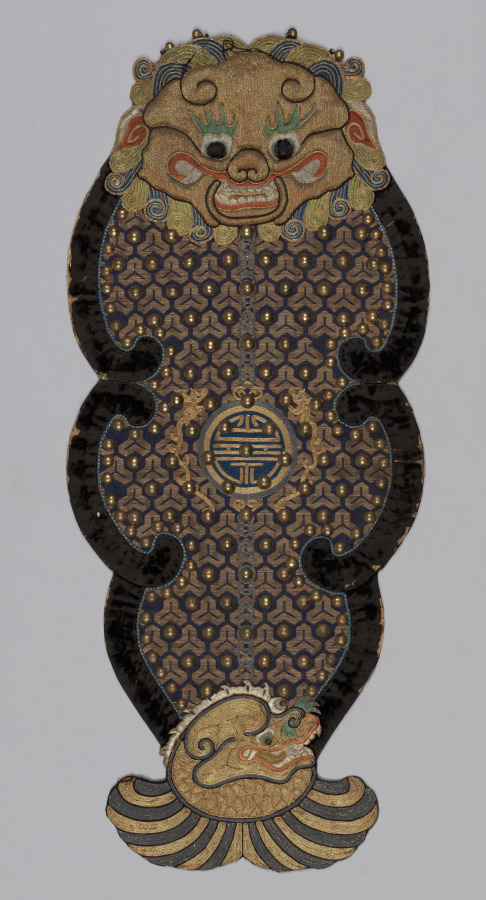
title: Ceremonial Uniform: Groin Apron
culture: China, Qing dynasty (1644-1911)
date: 1644–1911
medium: satin weave silk with gold metal thread embroidery; supplementary weft; black velvet; metal (brass?); lined in blue silk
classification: Arms and Armor